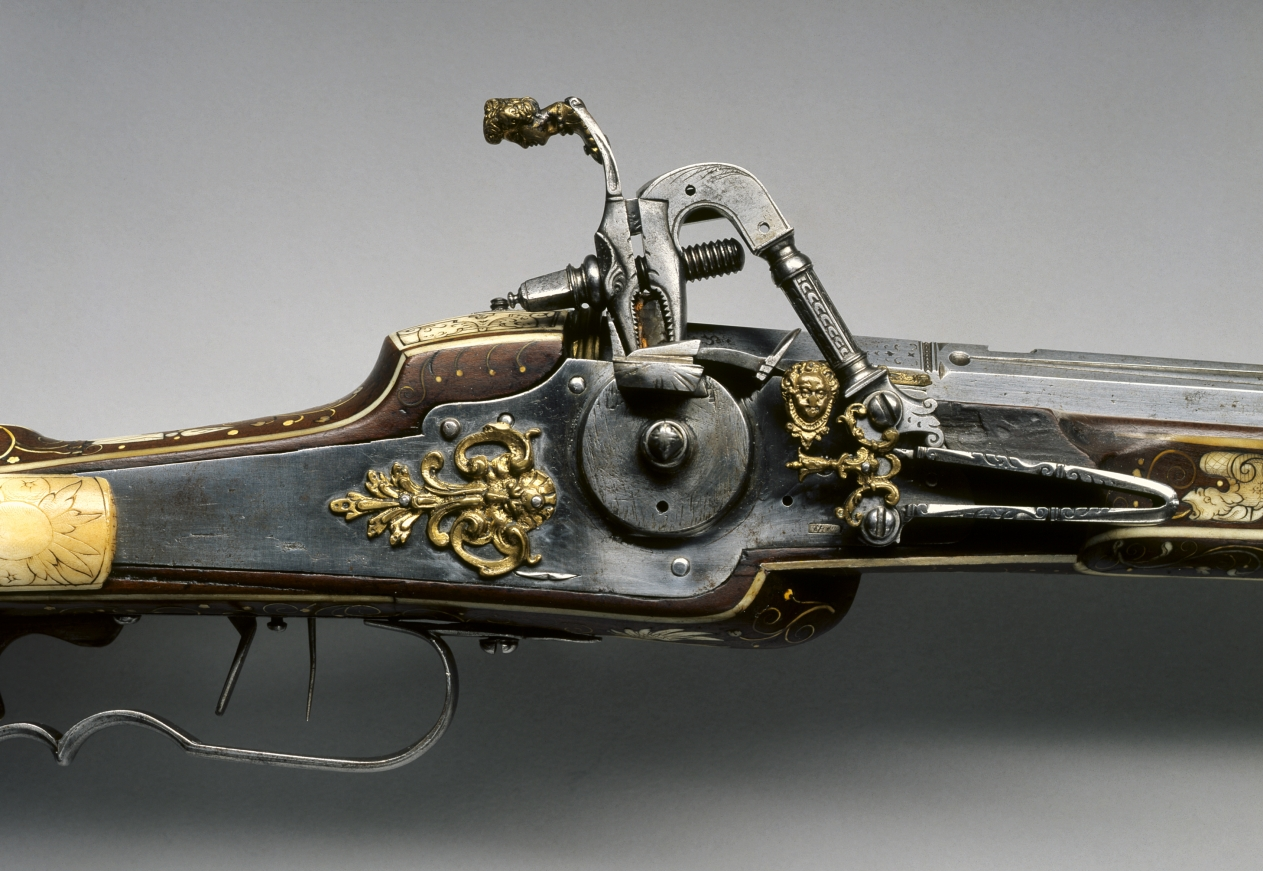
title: Wheel-Lock Rifle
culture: Germany, Bavaria (?), 17th century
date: 1618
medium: steel, brass, walnut stock inlaid with bone, horn and ivory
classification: Arms and Armor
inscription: on barrel: 1618, S.H.; on stock: FF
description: Made originally as a petronel pistol, this firearm seems to have been refitted with a new stock sometime during the 17th century to convert it into a rifle, most likely for a child's use.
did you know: The artisan who made this rifle used brass, bone, horn, and ivory to create decorative elements like animals involved in the hunt, fruits, and other details. If you look beneath the gun, you will see a goose or duck and a vase of flowers near the trigger.